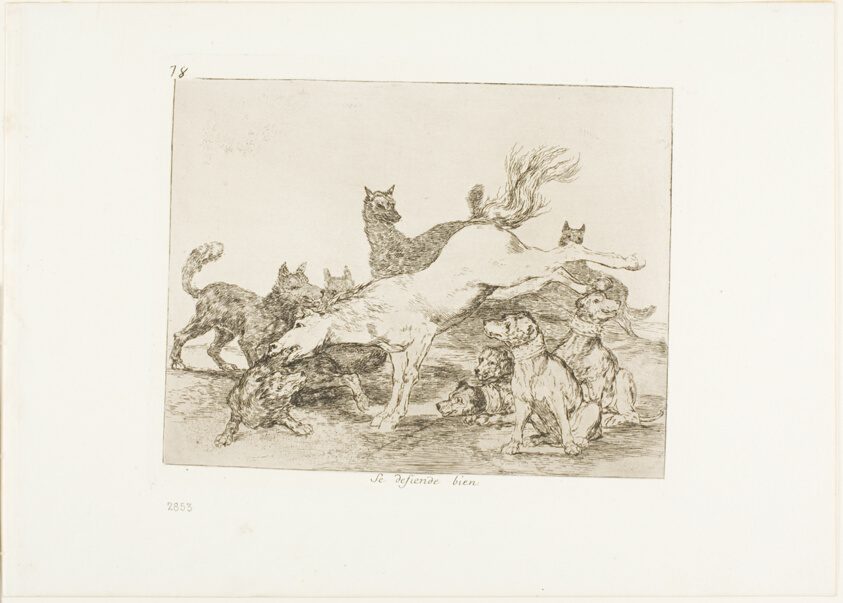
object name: Print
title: He defends himself well, plate 78 from The Disasters of War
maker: Francisco José de Goya y Lucientes (Spanish, 1746-1828)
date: 1815/20, published 1863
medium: Etching, drypoint, burin and burnishing on ivory wove paper with gilt edges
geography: Spain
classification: etching; print; prints and drawing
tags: war